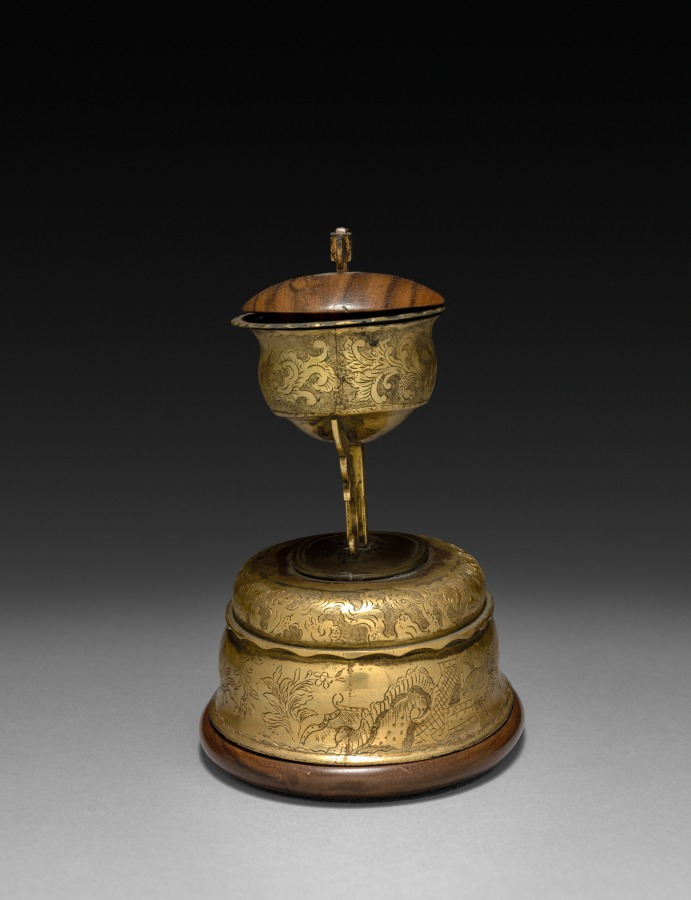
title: Incense Burner (?)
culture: Japan, Kamakura period (1185–1333)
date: 1185–1333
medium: gilt bronze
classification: Metalwork